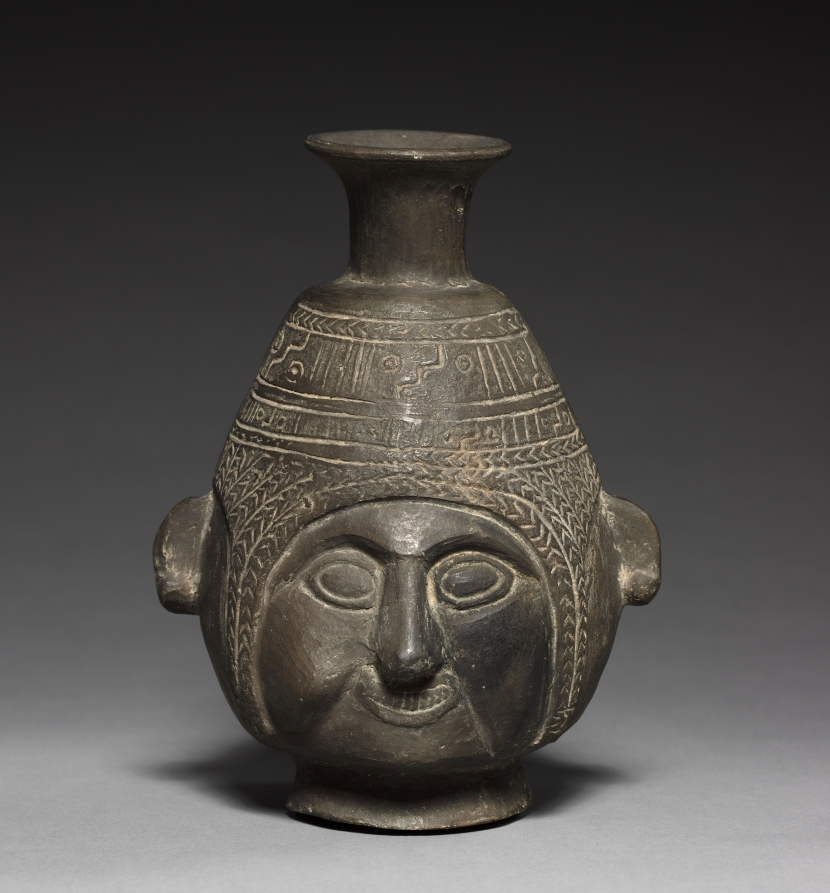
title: Bottle Vase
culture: Peru, Chimú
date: c. 1400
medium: black ware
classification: Ceramic